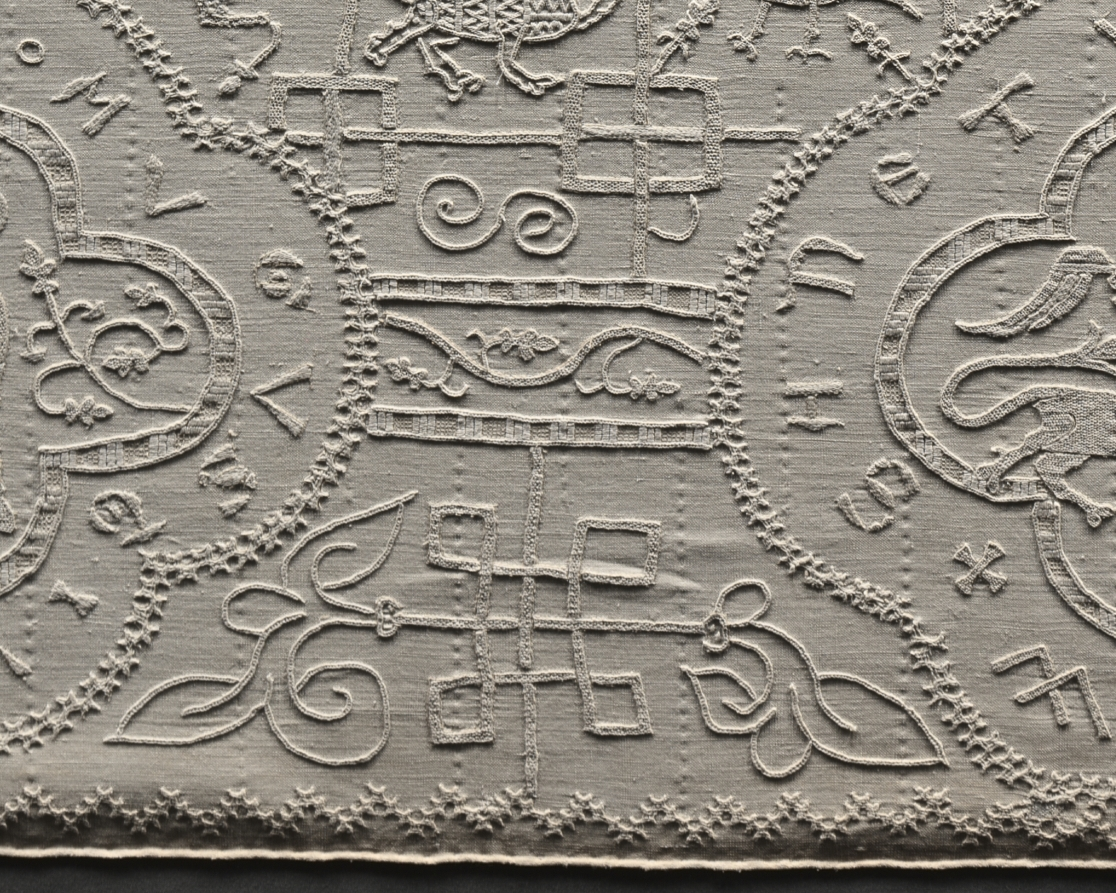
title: Altar Cloth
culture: Germany, Altenberg on the Lahn, Premonstratensian Convent, 14th century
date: c. 1350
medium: embroidery: linen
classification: Embroidery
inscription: various motifs enclosed in quatrefoils with identifying inscriptions in Gothic letters.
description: This large, embroidered altar cloth is one of the rarest, most important medieval church furnishings in existence. It was stitched by nuns in the Premonstratensian Convent in Altenberg on the Lahn River, north of Frankfurt, Germany, and was used to cover the church’s high altar in the weeks leading up to Easter. The cloth is an example of linen embroidery, a specialty of German nuns in the later Middle Ages. The Altenberg monastery church once had valuable furnishings; the high altar retable (a decorated frame with sculptures and paintings on the top of an altar) has survived, the main parts of which are now in the Städel Museum in Frankfurt, Germany.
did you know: When lit from behind, the previously hidden details emerge and the complex design becomes evident.